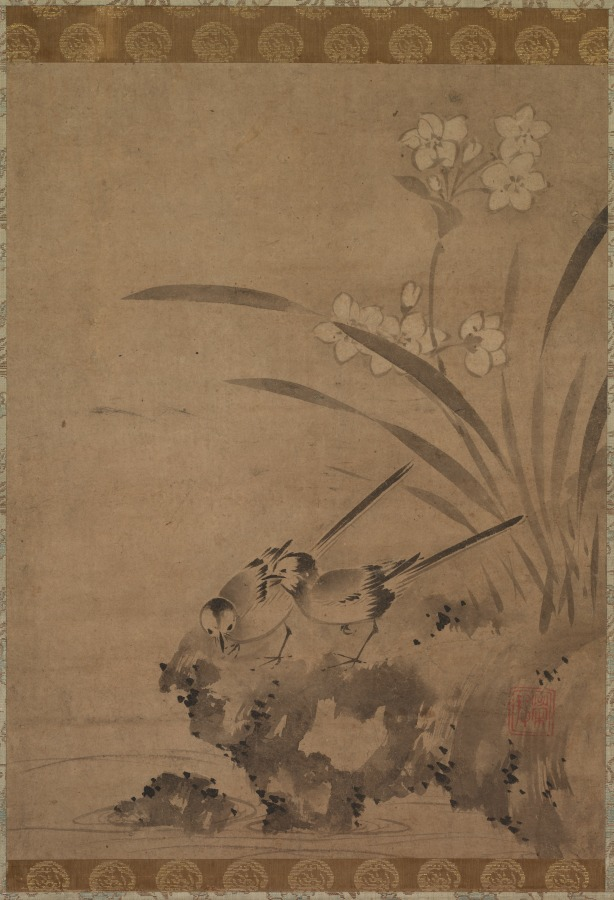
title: Wagtails and Narcissus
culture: Japan, Muromachi period (1392–1573)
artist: Eison (Japanese)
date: mid-1500s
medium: hanging scroll; ink on paper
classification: Painting